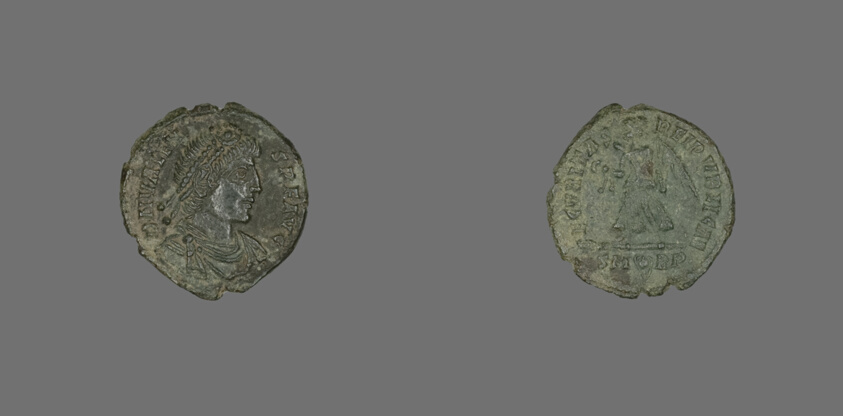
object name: Coin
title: Coin Portraying Emperor Valens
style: roman (ancient, style or period), ancient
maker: Roman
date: 364-378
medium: Bronze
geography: Roman Empire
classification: coin; ancient art